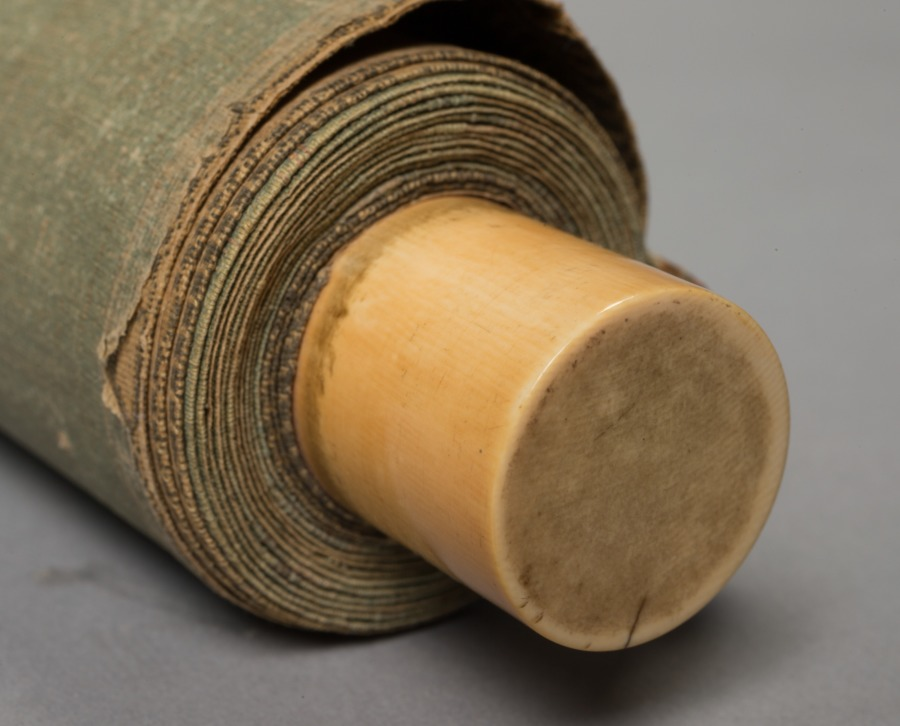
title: Bamboo in Rain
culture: Japan, Muromachi period (1392–1573)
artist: attributed to Genga (Japanese)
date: early 1500s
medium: hanging scroll; ink on silk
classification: Painting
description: East Asian paintings from China, Korea, and Japan were frequently conceived as sets of multiple images. These sets might have been composed for specific palace or temple rooms, or to portray a specific theme, such as the four seasons. Over time, the original intent of such sets is often lost through damage, changes in ownership, or a variety of other reasons. The identity of the artist can also be lost, but then, sometimes, retrieved. This pair of ink paintings has traditionally been labeled as Japanese and attributed to the 16th-century painter Genga. Since there are no seals or signature of the artist on the painting, this attribution was based on comparisons of brush style with paintings known to be by Genga. More recent study indicates that while the 16th century is an appropriate time frame for the pair, the precise cultural identity of the artist is not certain after all. The dark, eccentric shapes of the rocks and bamboo clusters and the dramatic tonal contrasts evident throughout the composition point to either Korean authorship or influence upon a Japanese painter of the period.